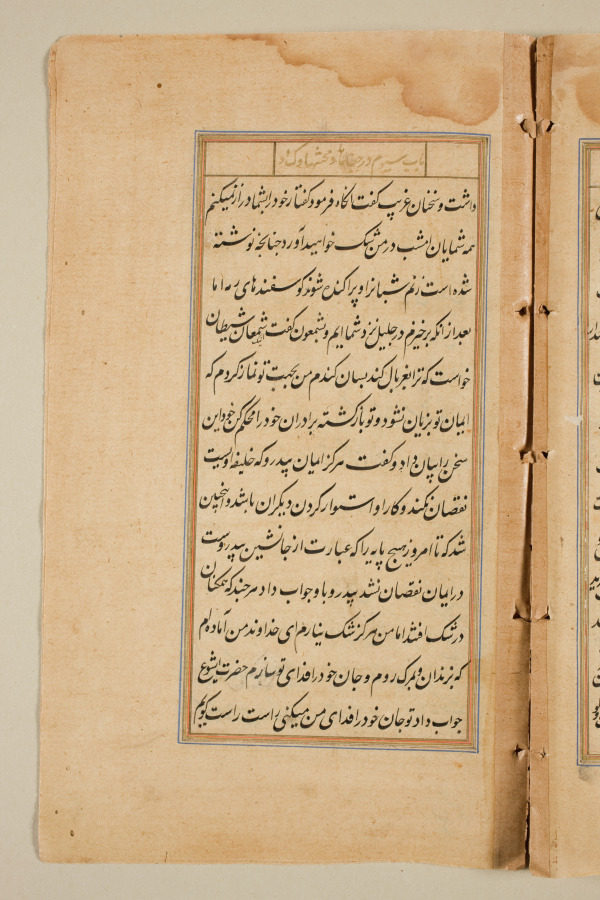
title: Text page from a Mirror of Holiness (Mir’at al-quds) of Father Jerome Xavier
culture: Mughal India, Allahabad, made for Prince Salim (1569–1627)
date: 1602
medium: Ink and gold on paper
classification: Manuscript